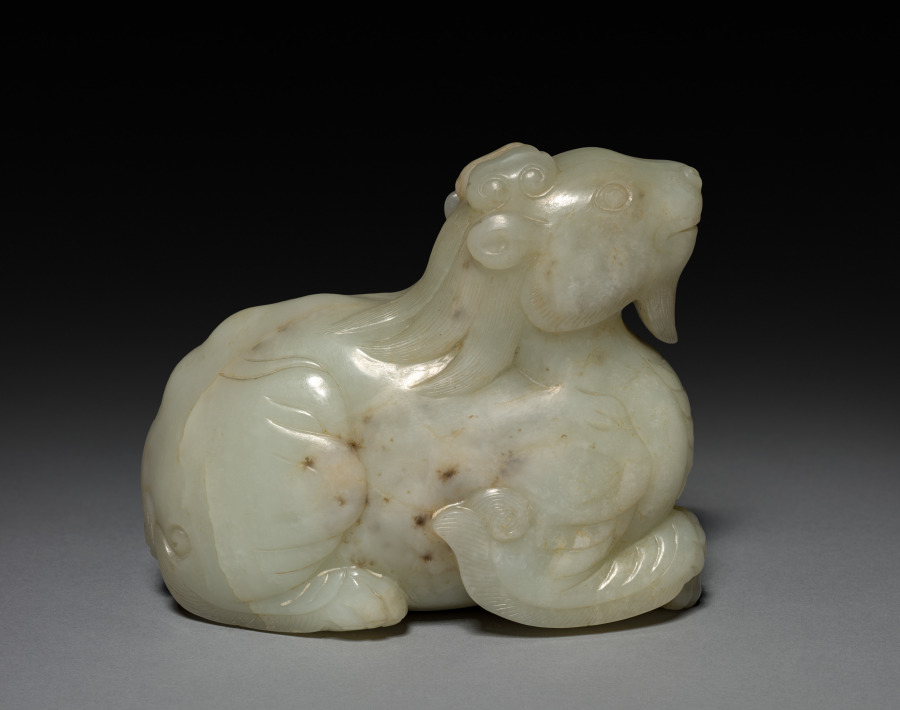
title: Fantastic Animal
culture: China, Qing dynasty (1644-1911)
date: 1700s–1800s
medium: jade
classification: Jade